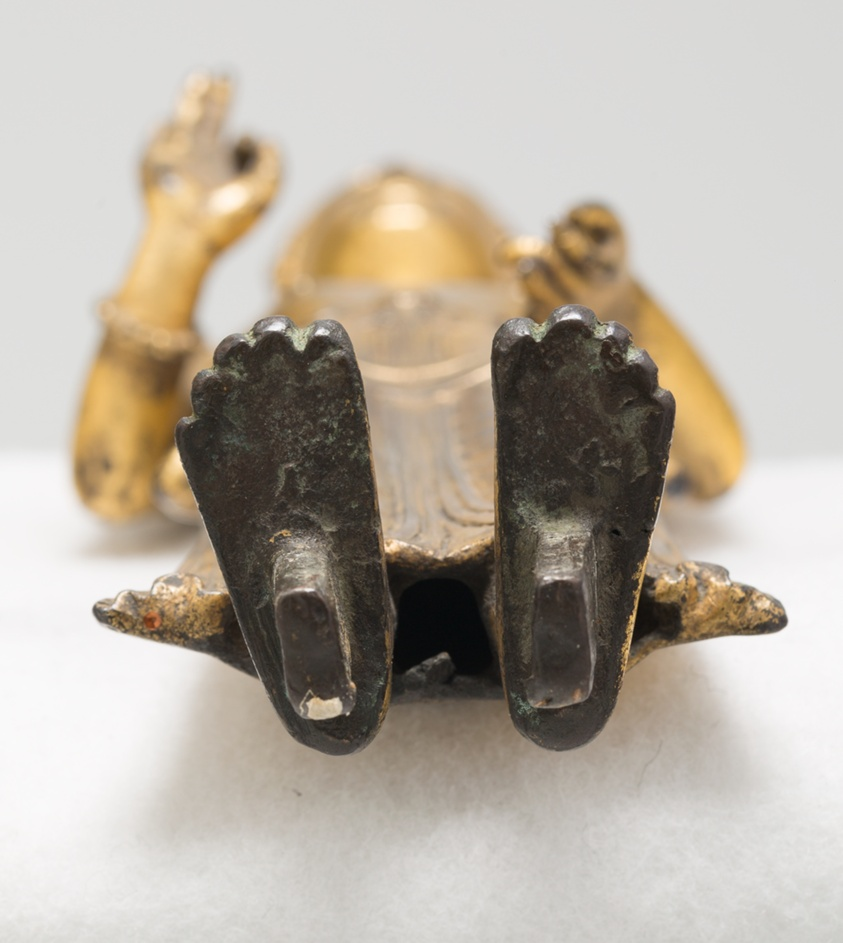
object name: Sculpture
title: Guanyin (Avalokiteshvara)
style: Chinese (culture or style)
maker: China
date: Dali kingdom (c. 937–1253), 12th century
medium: Gilt copper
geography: China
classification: bronze; metal; sculpture; asian art